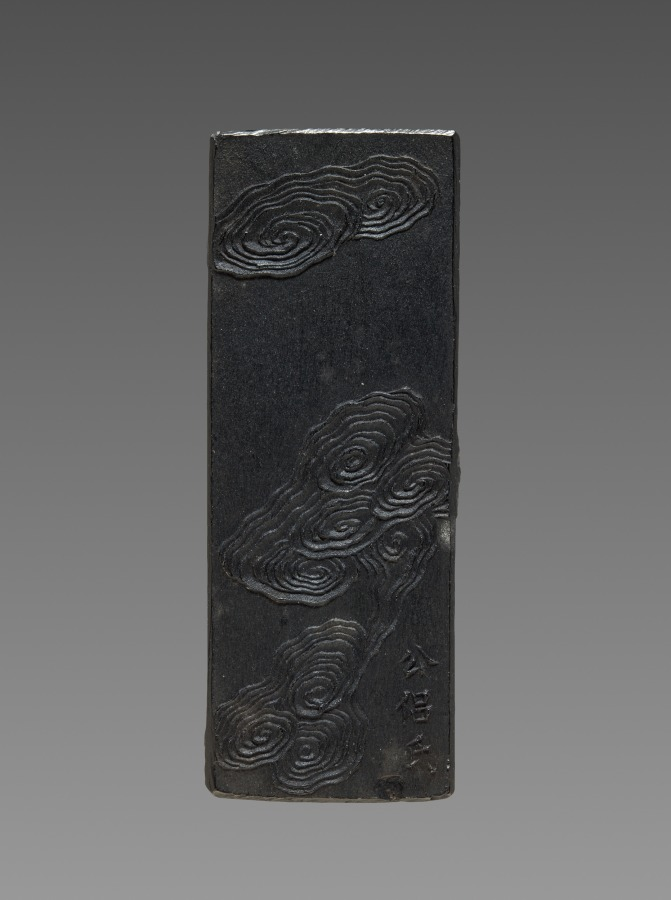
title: Ink Cake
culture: China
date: 1800s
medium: ink cake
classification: Miscellaneous